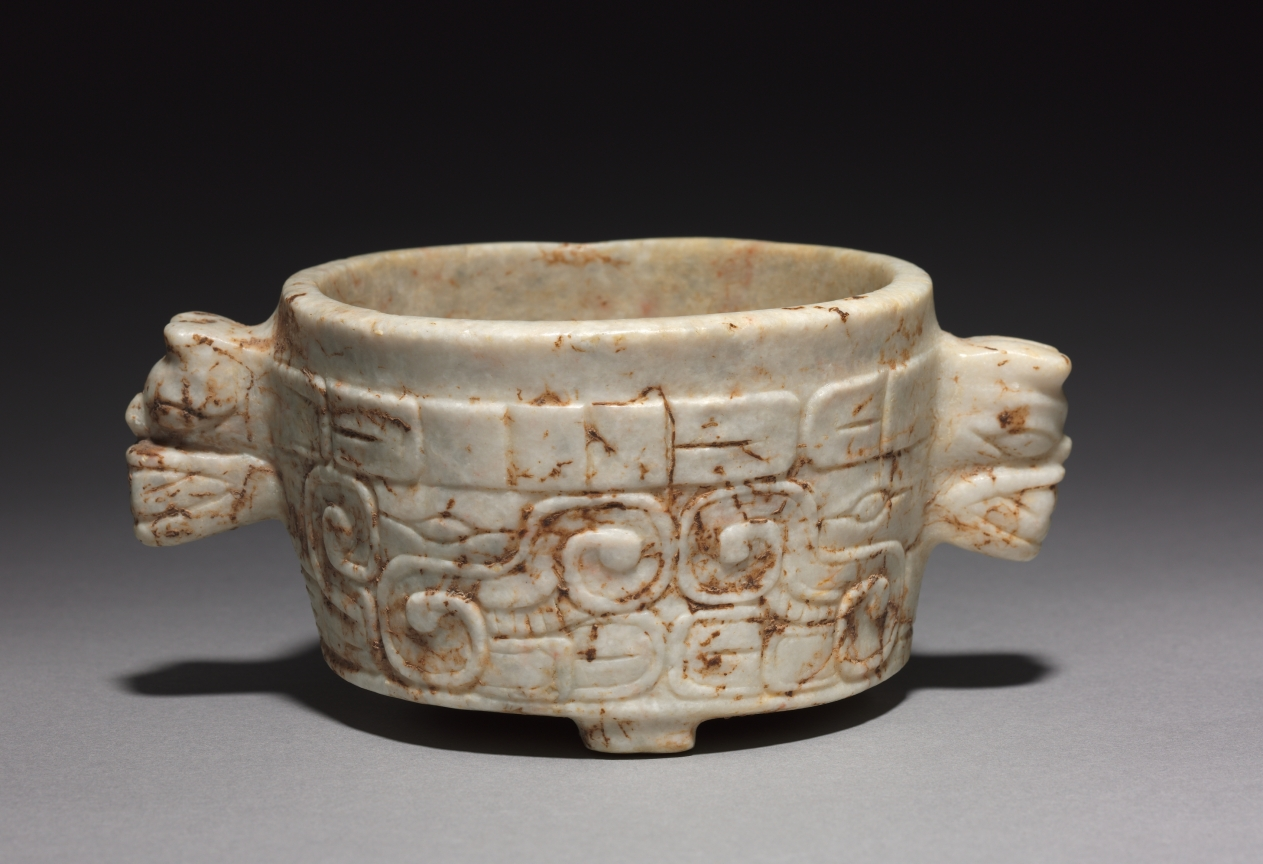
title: Tripod Bowl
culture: Honduras, Ulúa Valley, 7th-10th century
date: 600–1000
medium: marble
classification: Sculpture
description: Between about 600 and 800, white marble vessels carved in dense relief on their outer surfaces were a form of luxury and wealth in the Ulúa region of Honduras. Two confronting profile zoomorphic heads occur on each side of this example, between three-dimensional handles shaped as bat heads. Originally the vessel may have been covered with stucco and brightly painted.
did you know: One of two vessels that were the first ancient American artworks collected by James and Florence Gruener.